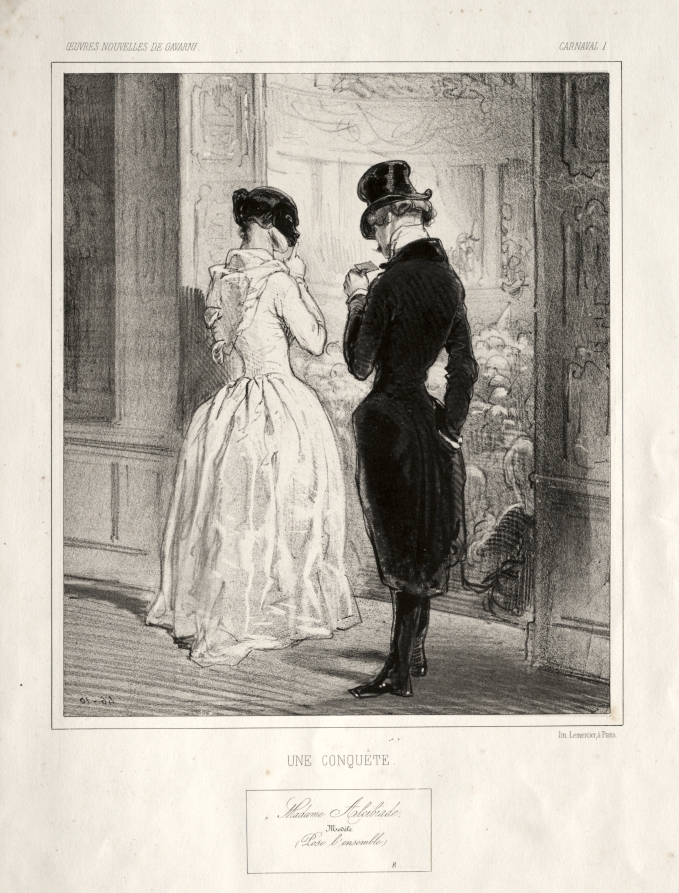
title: Carnaval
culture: France, 19th century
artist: Paul Gavarni (French, 1804–1866)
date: c. 1841–47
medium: lithograph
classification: Print